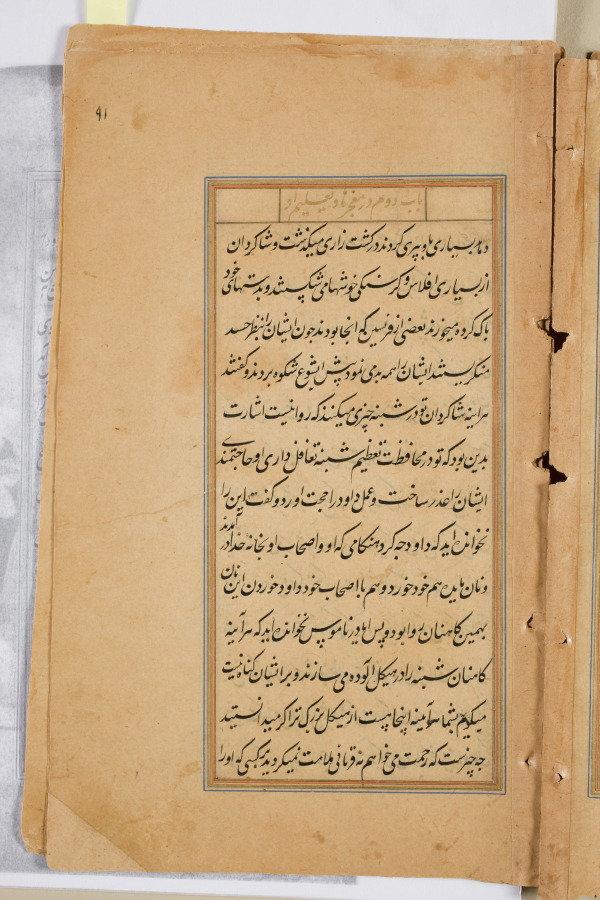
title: Text page from a Mirror of Holiness (Mir’at al-quds) of Father Jerome Xavier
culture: Mughal India, Allahabad, made for Prince Salim (1569–1627)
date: 1602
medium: Ink and gold on paper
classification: Manuscript